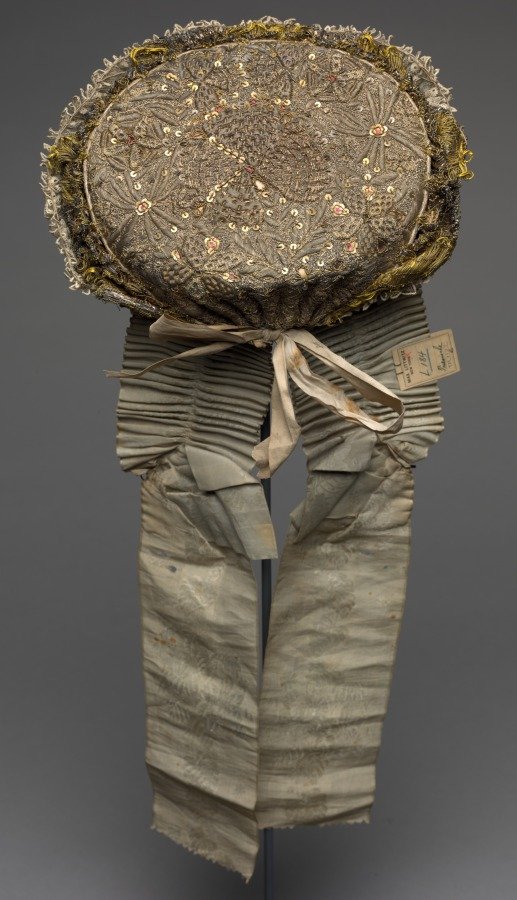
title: Embroidered Headdress (Called "Triesische")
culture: Germany, 18th century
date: 1700s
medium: embroidery, metallic thread and spangles; lace edging and ribbon streamers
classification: Garment